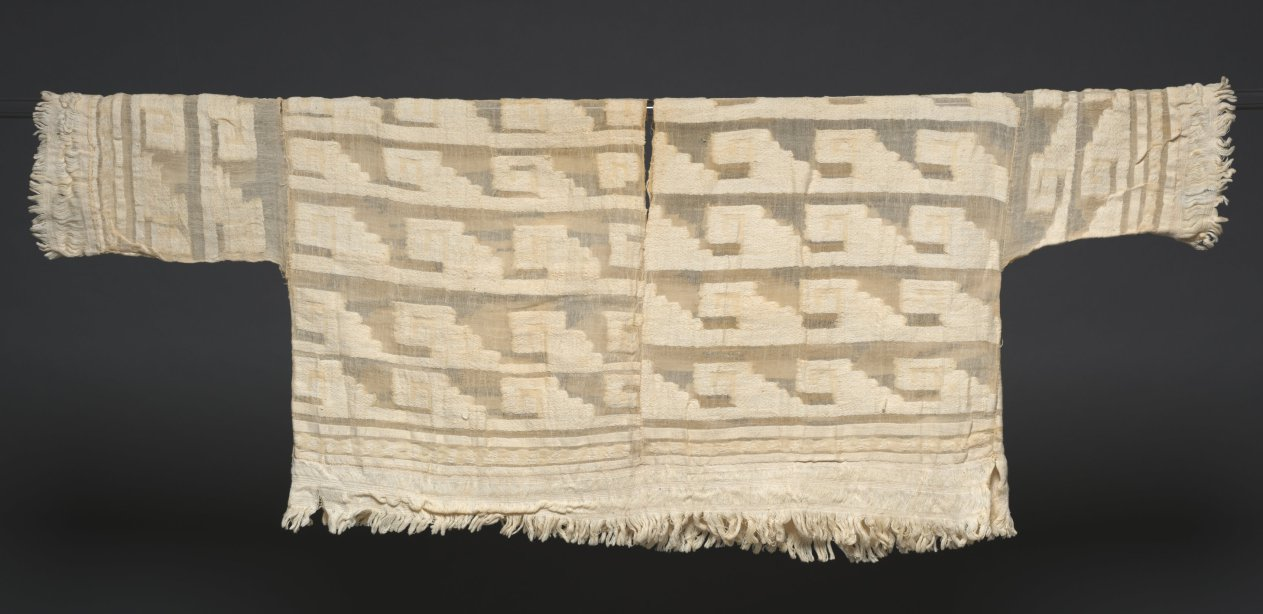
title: Tunic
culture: Peru, Chimú or Chimú-Inka, 12th-16th century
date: 1100–1532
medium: white cotton; plain weave with supplementary weft brocading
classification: Textile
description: This garment embodies an important principle of the Chimú textile aesthetic: a love of combining different textures, some dense and sculptural and others so open and airy they are nearly invisible. (The hand-spun yarns are only .1 to .2 millimeters in diameter.) It also elegantly articulates the simplified, spare visual vocabulary that the Chimú favored, here geometric motifs.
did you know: The Chimú forged an empire that thrived until the 1460s, when the Inka incorporated it into their own imperial domain.